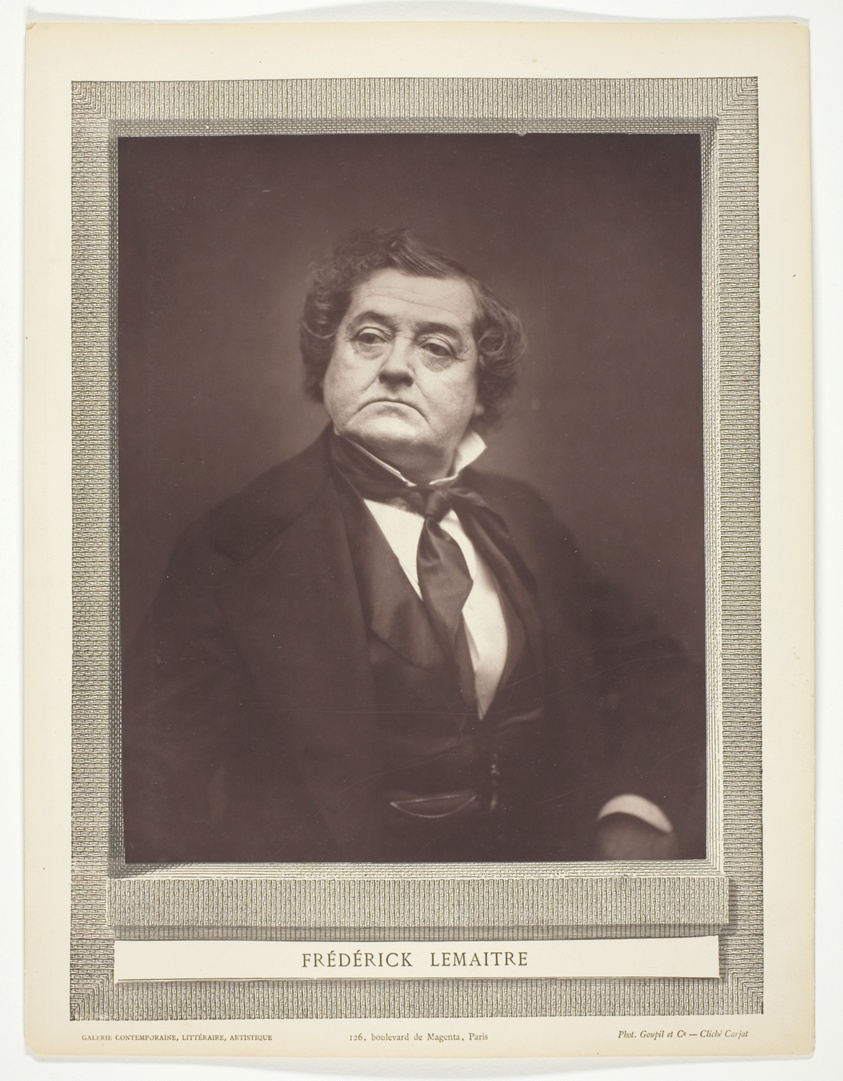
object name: Photograph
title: Fréderick Lamaître (French actor and playwright, 1800-1976)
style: 19th century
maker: Étienne Carjat; French, 1828–1906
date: c. 1876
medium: Woodburytype, from the periodical “Galerie Contemporaine Littéraire, Artistique” (1876), volume 1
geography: France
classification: woodburytype; photomechanical process; photography; photograph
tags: Collected by Hugh Edwards, Contemporaine Littéraire